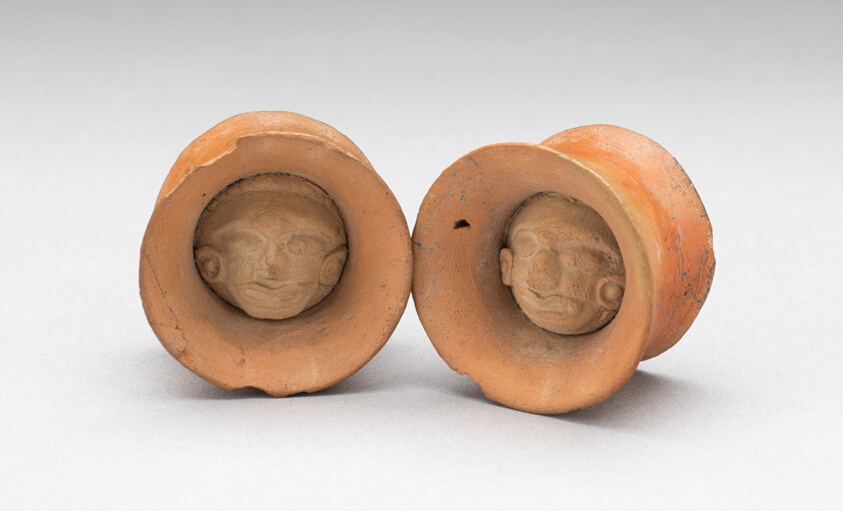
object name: Costume and Accessories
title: Pair of Earspools with Face in Interior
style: mesoamerican, Arts of the Americas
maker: Possibly Veracruz, Mexico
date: Possibly 450–1000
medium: Ceramic and pigment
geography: Veracruz state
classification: ear ornament; earthenware; ceramics; jewelry; costume; art of the americas